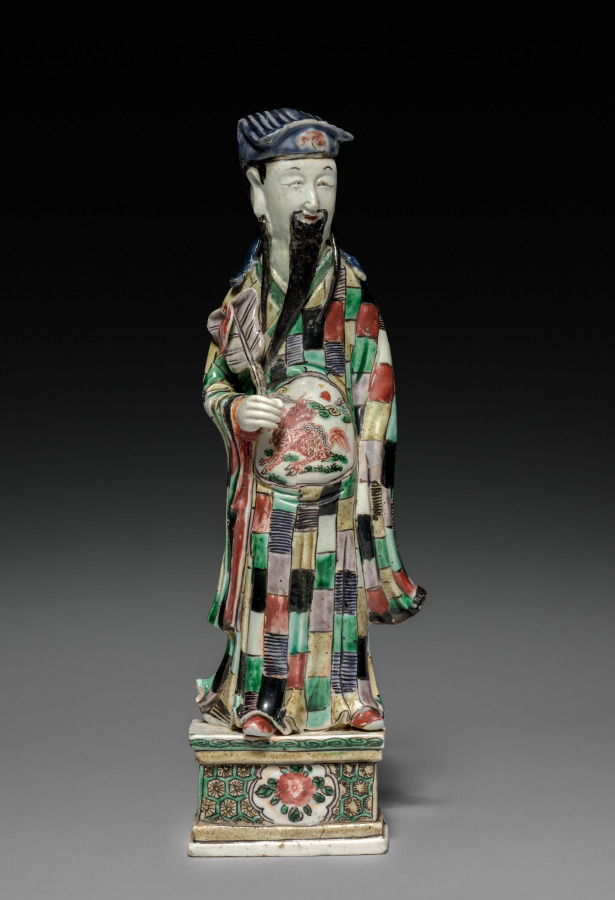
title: Daoist Immortal Zhongli Quan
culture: China, Jiangxi province, Jingdezhen kilns, Qing dynasty (1644-1911), Kangxi reign (1662-1722)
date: 1662–1722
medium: porcelain with famille verte overglaze enamel decoration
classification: Ceramic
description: This porcelain figure represents Zhongli Quan as a scholar. He is wearing a scholar’s hat and carries a scroll on his back. He holds a fan that, according to legend, could bring the dead to life. Thus, he also bears the auspicious meaning of longevity. On his bare belly, the potter painted a qilin, a mythical auspicious creature that turns his head to the sun. The same design in different colors also decorates his back.